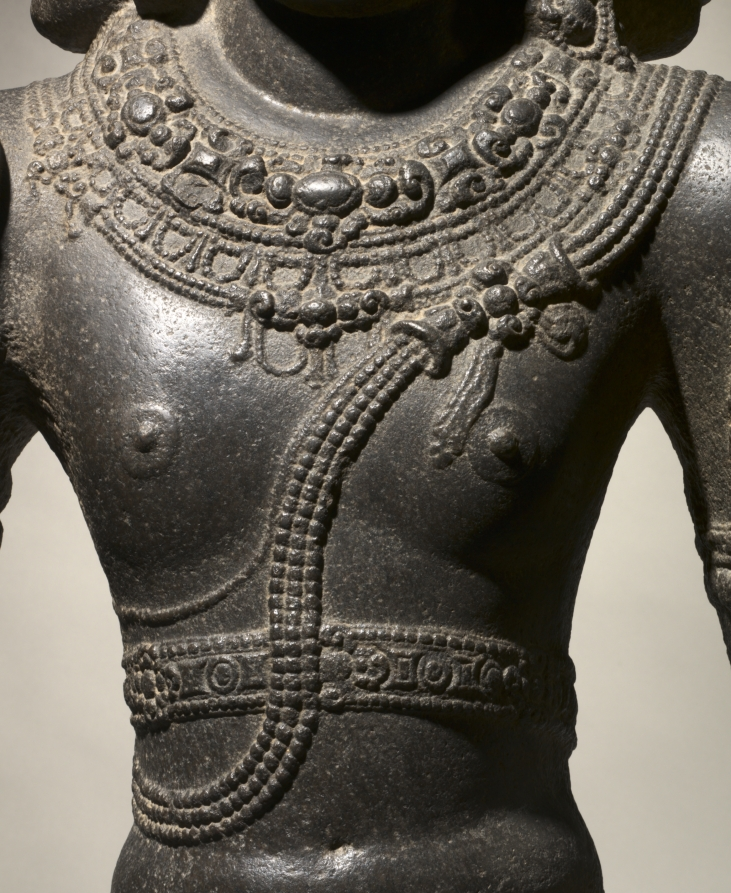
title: Brahma-Shiva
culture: South India, Tamil Nadu, Chola dynasty, late 10th - early 11th century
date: late 900s–1000s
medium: granite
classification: Sculpture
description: In the Hindu pantheon Brahma is in charge of carrying out the work of creation. In this tour-de-force of South Indian temple sculpture, he is in a special regal aspect, with the only elements of his typical priestly appearance being the prayer beads and the matted dreadlocks piled on his head. Four arms connote superhuman power, and four heads convey the idea that his creative activities spread in all four directions. His upper right hand enjoins freedom from fear, and the lower holds a lotus bud associated with birth and the process of creation. His lowered left hand is held in the gift-giving gesture, suggestive of the gift of creation he will bestow upon the world.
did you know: The back of the sculpture retains the original textured surface from a pointed chisel, suggesting it was in a niche or near a wall, protected from worshippers’ touches.